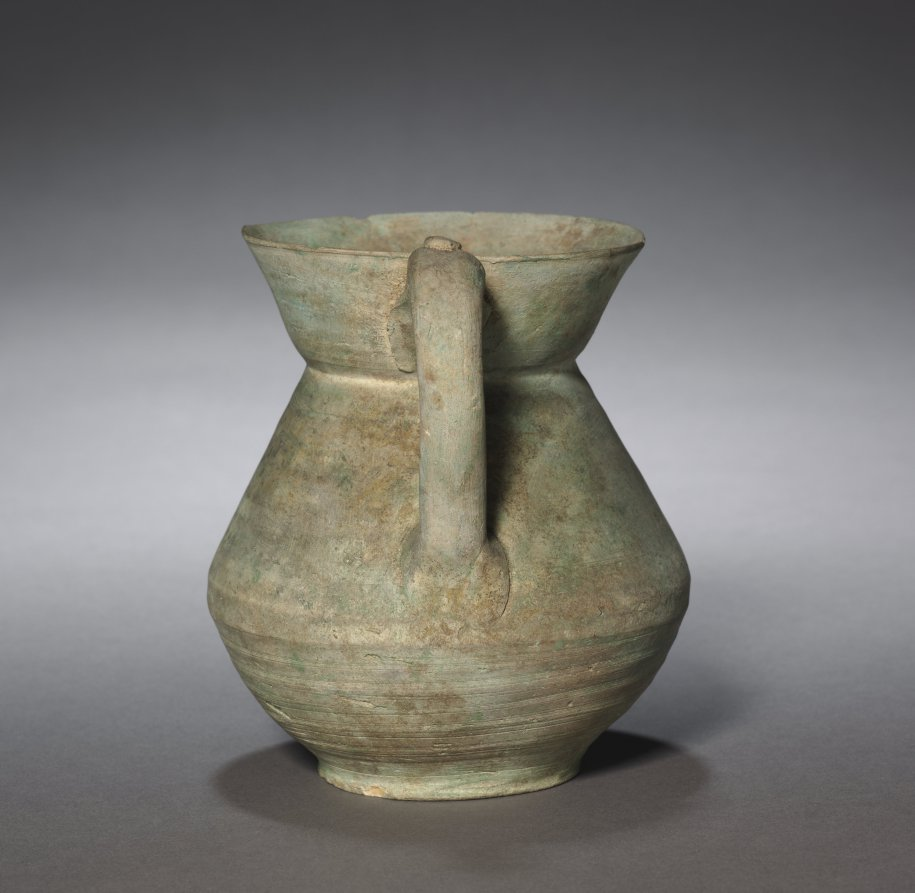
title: Jug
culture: Iran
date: 900s–1100s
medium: earthenware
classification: Ceramic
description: This jug was acquired in 1915, prior to the museum opening.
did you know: The handle has a thumb rest.